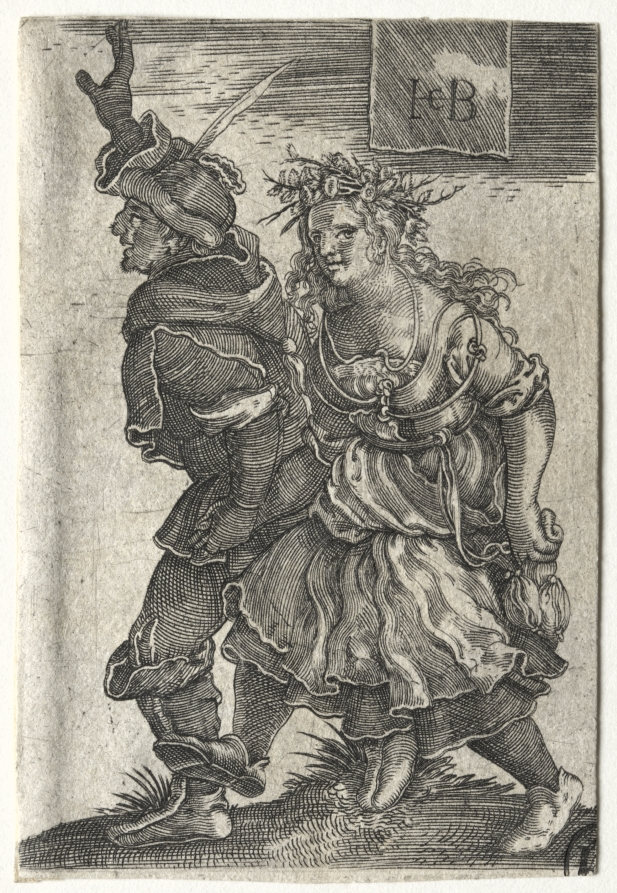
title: A Dancing Couple of Peasants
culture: Germany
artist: Jacob Binck (German, 1500–1569)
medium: engraving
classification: Print